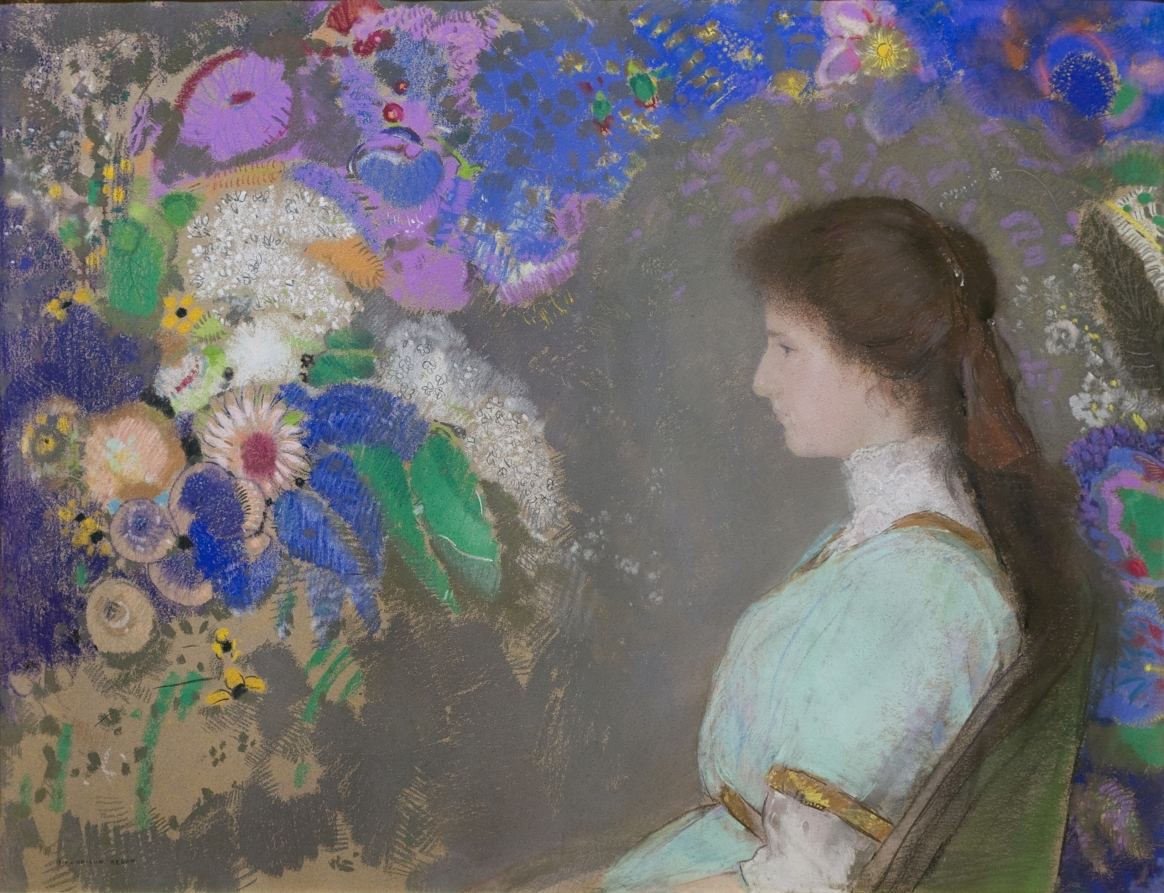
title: Violette Heymann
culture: France, early 20th Century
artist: Odilon Redon (French, 1840–1916)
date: 1910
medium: pastel on gray wove paper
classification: Drawing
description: Although he was known early in his career for works primarily in black and white, such as charcoal drawings and lithographs, Odilon Redon turned to more colorful media, including pastel, later on. In particular, he focused on commissioned pastel portraits of women with flowers, such as this one. Here, the young niece of the Parisian collector Marcel Kapferer appears alongside colorful blossoms as she looks forward, focused as if in the dreamlike state evoked by her surroundings.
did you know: This pastel was acquired by the Cleveland Museum of Art in the same year as several other works by Redon, leading arts writers to describe Cleveland as holding the most important works by the artist outside of Paris at the time.